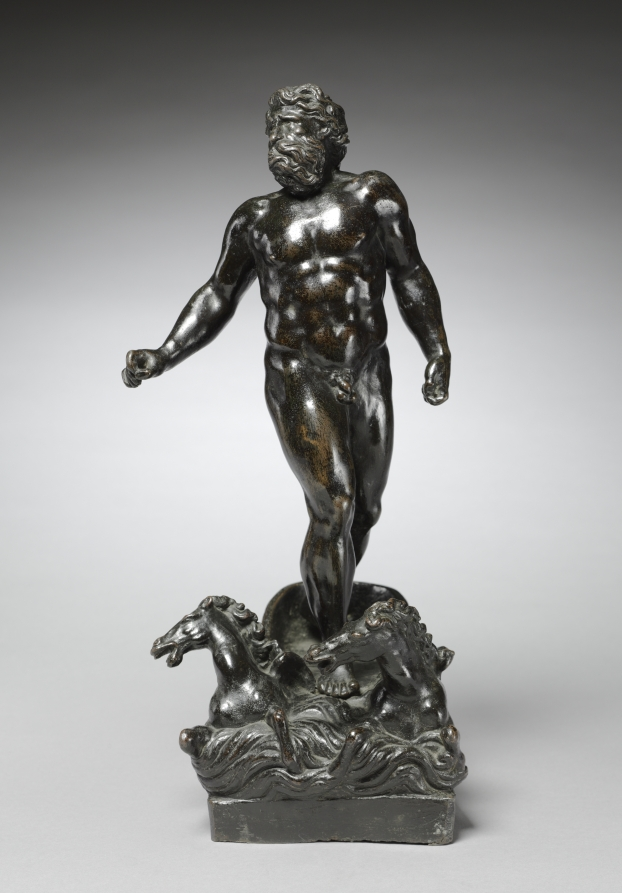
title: The Wrath of Neptune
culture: Italy, 16th century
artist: cast after a model by Tiziano Minio (Italian, 1511/12–1552)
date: late 1500s to early 1600s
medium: bronze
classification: Sculpture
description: In Roman mythology, Neptune (or Poseidon in Greek mythology) is the god of flowing water and is believed to protect against droughts. This small bronze is likely a sculptural representation of the Wrath of Neptune from the Aeneid. During the Trojan War, Juno incited winds to sink Trojan ships. Infuriated by Juno's incursion into his domain of the sea, Neptune rides out in his chariot, saving the Trojan army and threatening to punish the winds for their insolence. The massive, muscular nude male figure stands upright on his seahorse-drawn chariot, twisting to face the wind. The turbulent waves and the windblown hair and beard of the figure give life to this small bronze. The figure's left hand would have originally held reins, while the right hand, which once held a trident, is outstretched in the act of commanding the waves to be still. This bronze was once attributed by art historian Wilhelm von Bode to Jacopo Sansovino based on its similarity to known works, such as the over-life-size marble figure of Neptune of the Scala di Giganti outside of the Doge's Palace in Venice. However, by 1921 Leo Planiscig had noted the CMA Neptune's similarity to bronzes and reliefs by Sansovino's pupil, Tiziano Minio, in the Loggetta at San Marco Square, Venice. In Minio's Jupiter on the Island of Candia for the Loggetta, the waves are represented with the same incised, undulating grooves as in this work. Neptune possesses the same stocky proportions and heavy musculature which was characteristic of Minio. The high polish and sweeping contours of the figure are characteristic of Sansovino, but the heightened drama of the subject display Minio's stylistic advancement from his teacher.